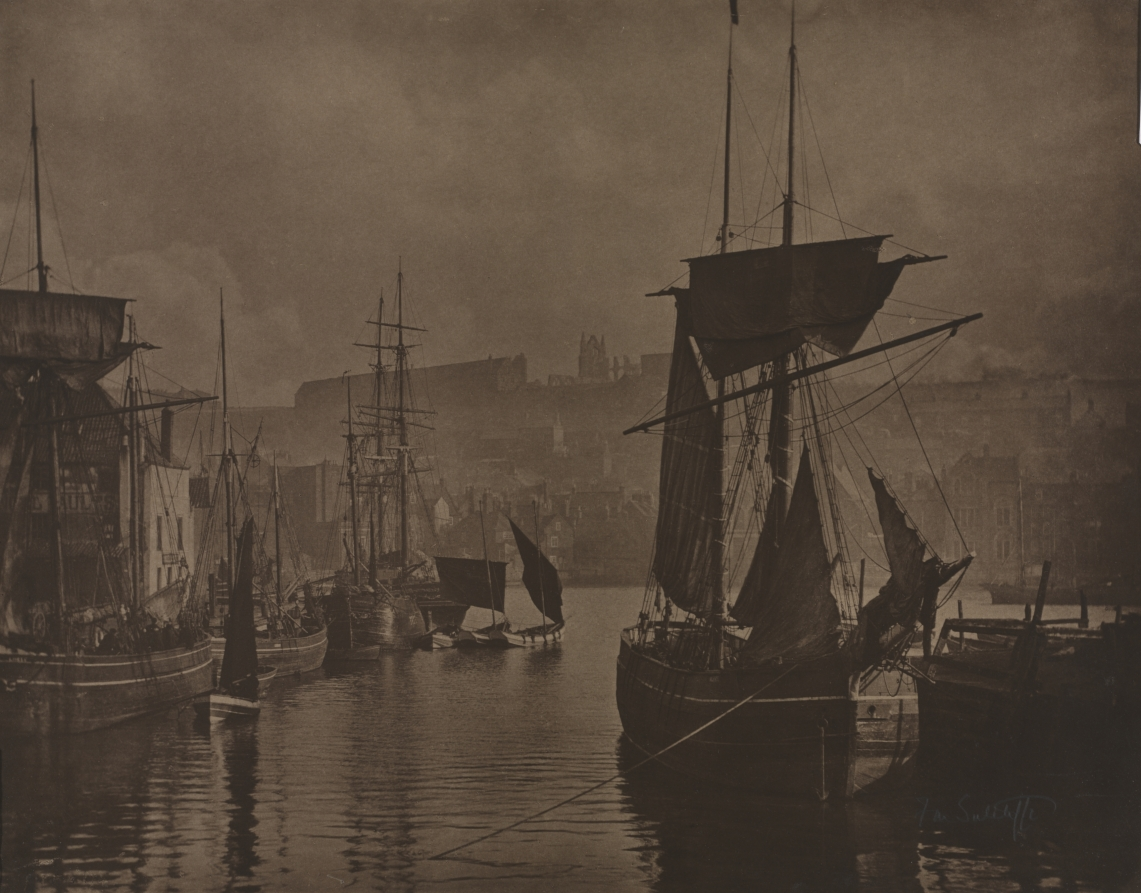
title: Whitby Harbor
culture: England, 19th century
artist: Frank Meadow Sutcliffe (British, 1853–1941)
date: c. 1885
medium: carbon print, toned, from glass negative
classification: Photograph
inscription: Written in grease pencil [?] on recto: "Frank Sutcliffe [signed]"; in pencil on verso: "Frank Sutcliffe [signed] / Whitby"